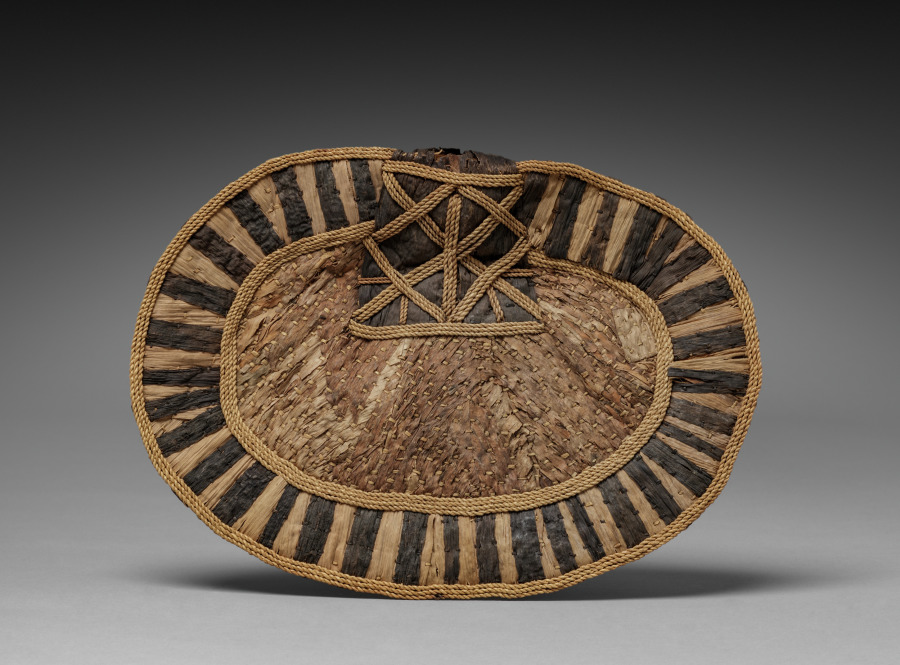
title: Back Skirt/Sitting Pad (negbe)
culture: Africa, Central Africa, Democratic Republic of Congo, Mangbetu-style makers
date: by 1928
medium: Plant fibers and dye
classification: Garment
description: Egbe (singular: negbe) were fashionable and practical garments aristocratic Mangbetu women made for special occasions. Worn over a skirt, it tied onto a girdle along with a frontal “apron.” The curved interior piece rested on the lower back. Thickly woven, flexible natural fibers bent with the body, cushioning the wearer’s behind when sitting. When the woman was standing, the decorated flat portion faced outward, showing off bold geometric motifs. Egbe were among items sold to foreigners at the Mangbetu king’s encouragement as the Mangbetu actively constructed their self image for outsiders during the 1920s and 1930s.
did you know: A curved "handle" on the negbe's interior allowed it to rest on the tailbone.